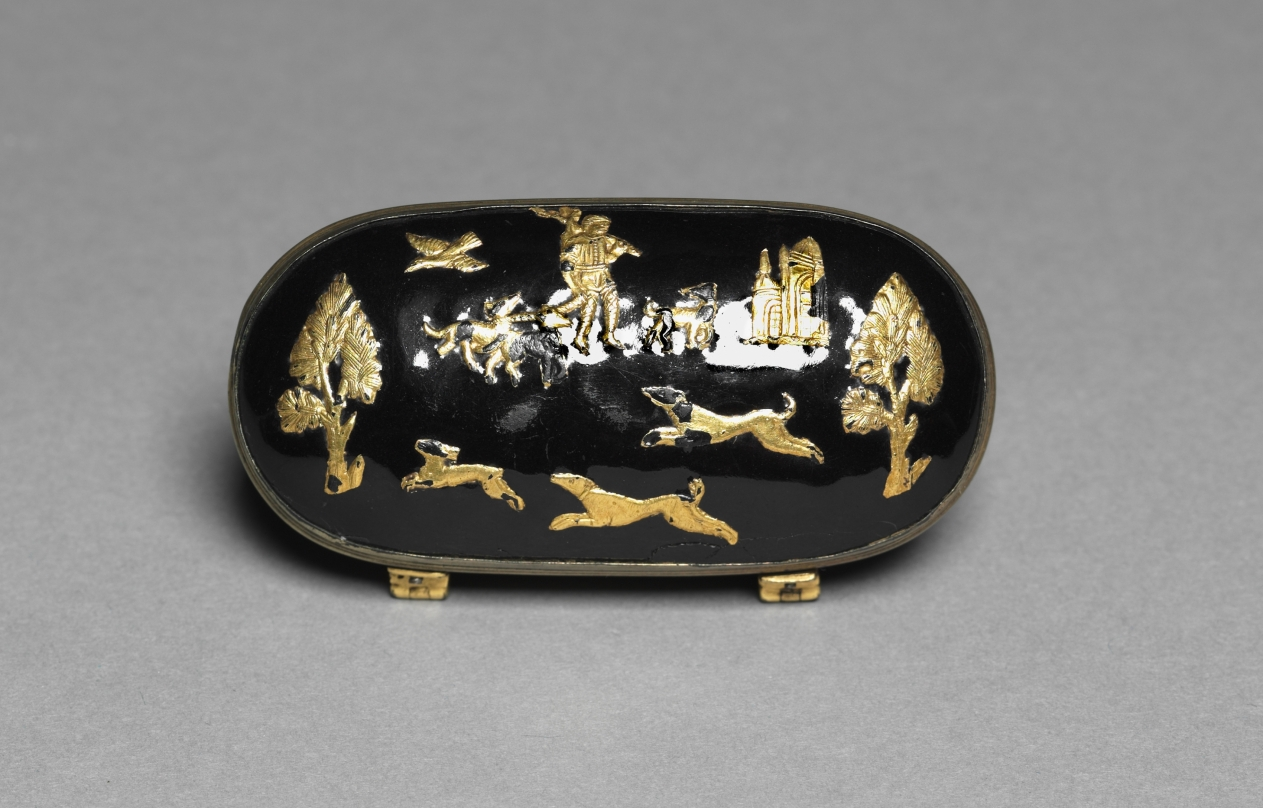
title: Snuff Box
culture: Germany, 19th century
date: 1800s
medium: enamel on copper with metal mounts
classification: Miscellaneous